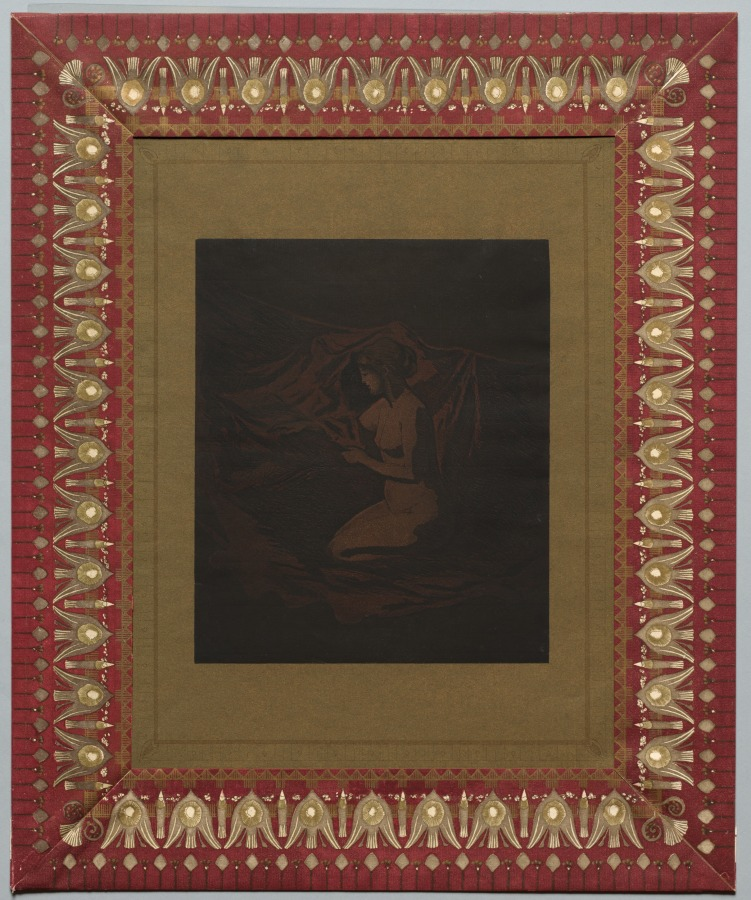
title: Embers Glow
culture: France, 19th century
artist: Theodore Roussel (French, 1847–1926)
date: 1890–1897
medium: color etching and aquatint mounted on original aquatint mount with etched and aquatinted framing papers surrounding the impression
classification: Print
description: French artist Theodore Roussel took up etching while living in London during the late 1880s, developing his own techniques and distinctive style. Here, Roussel used aquatint to show a nude woman dimly lit by a fire. To accurately represent the evocative lighting described in the work’s title, Roussel mixed pigments to produce his own inks and carefully applied them to the plate with stencils. He also developed a method of registration so that the mat and frame—both his own printed designs—aligned precisely with the image.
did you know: Theodore Roussel was one of the few artists to use metallic ink in his printing around the time this print was made.